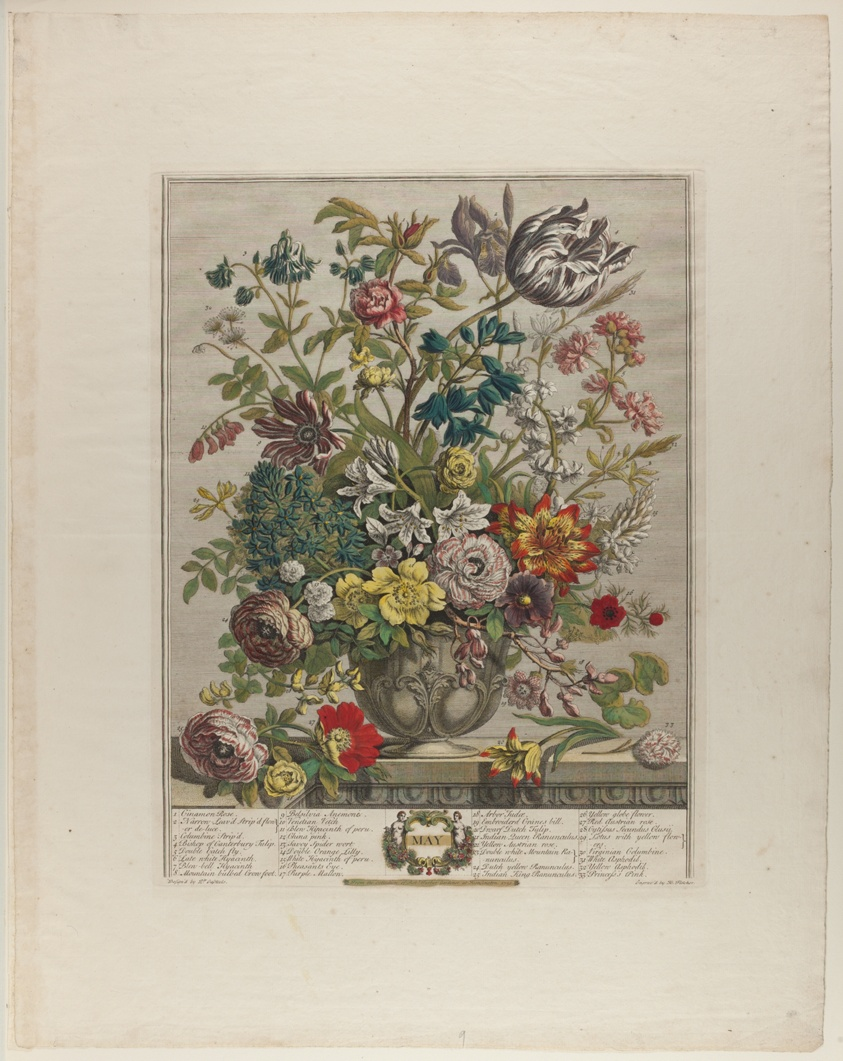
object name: Print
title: May, from Twelve Months of Flowers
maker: Henry Fletcher (English, 1710-1750); after Peter Casteels III (Flemish, 1684-1749)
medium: Engraving in black ink with opaque and translucent watercolor on cream laid paper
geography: England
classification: etching; print; prints and drawing